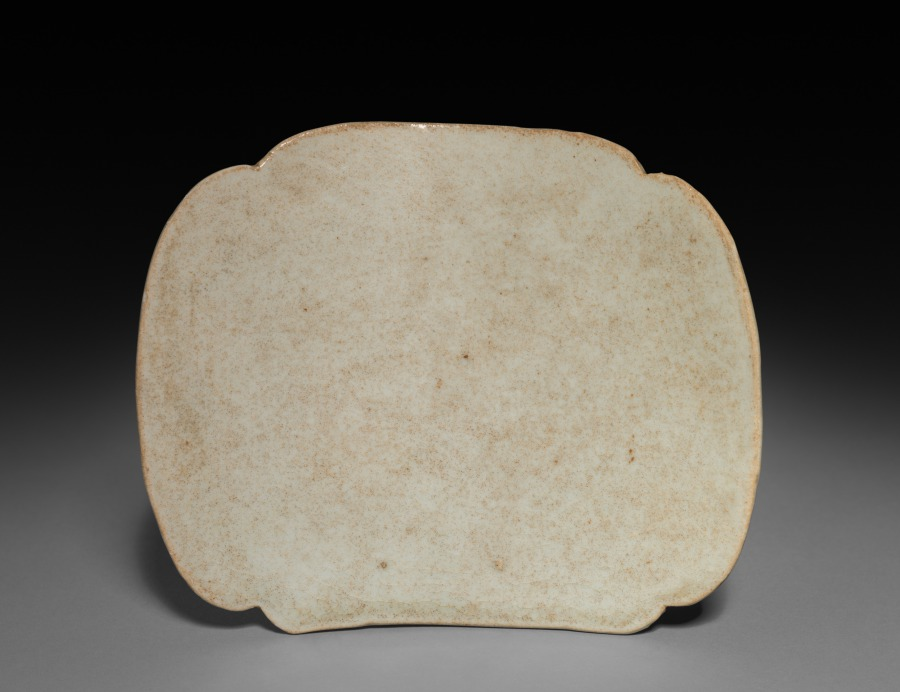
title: Pillow with Lion Base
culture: China, Northern Song dynasty (960-1127)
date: 1000s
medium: Glazed stoneware, qingbai ("blue-white") ware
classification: Ceramic